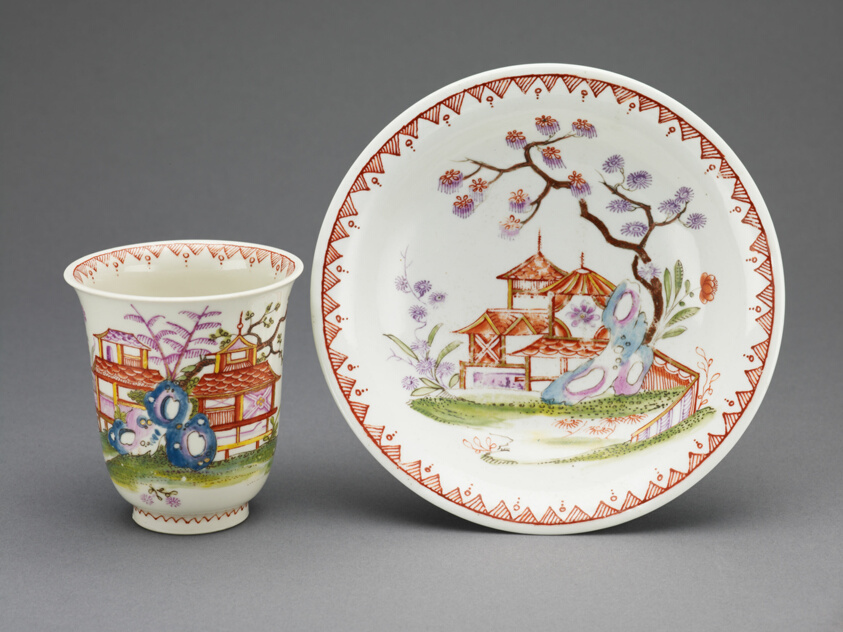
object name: Ceramics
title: Cup and Saucer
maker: Du Paquier Porcelain Manufactory (Austrian, 1718–1744); Austria, Vienna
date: c. 1725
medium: Hard-paste porcelain, polychrome enamels, and gilding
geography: Vienna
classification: drinking vessel; teaware; porcelain; european decorative arts; ceramics